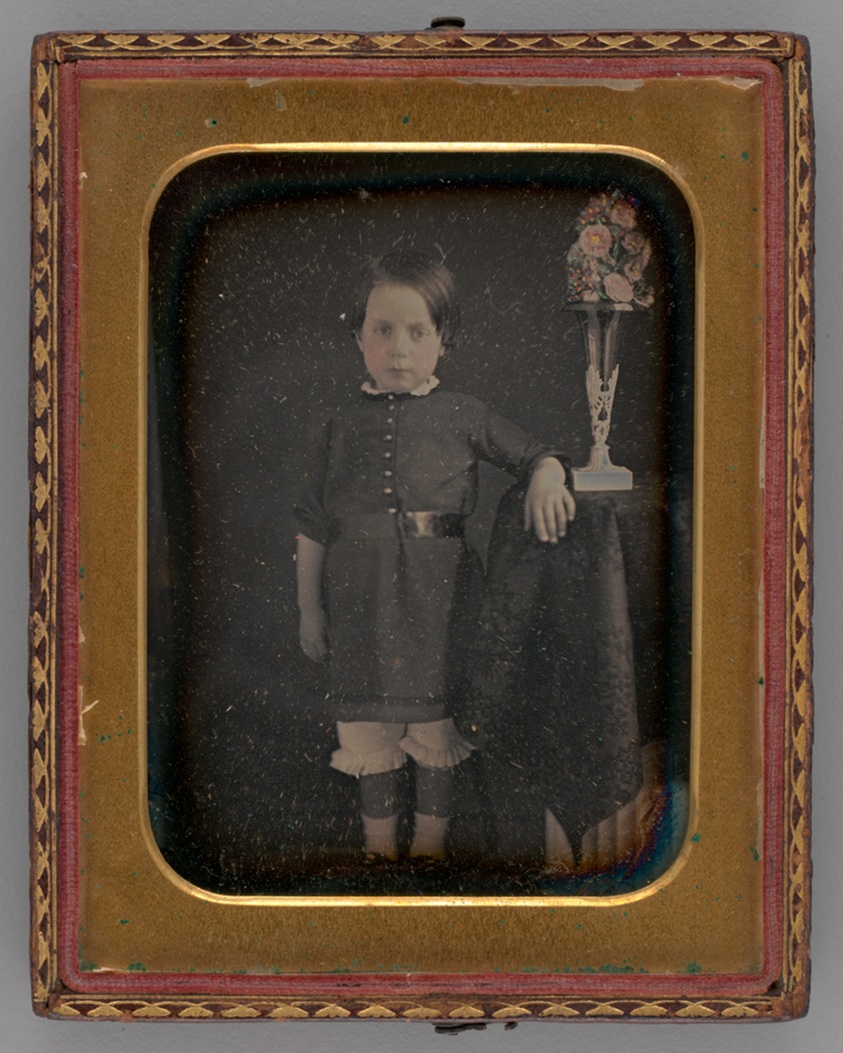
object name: Photograph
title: Untitled (Portrait of a Standing Boy)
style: 19th century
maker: Unknown maker; American, 19th century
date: 1848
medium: Daguerreotype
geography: United States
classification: portrait; photograph; photographic process; photography; portrait; daguerreotype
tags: lundberg collection, portrait, Male, boys, portraits, portraits: child subject